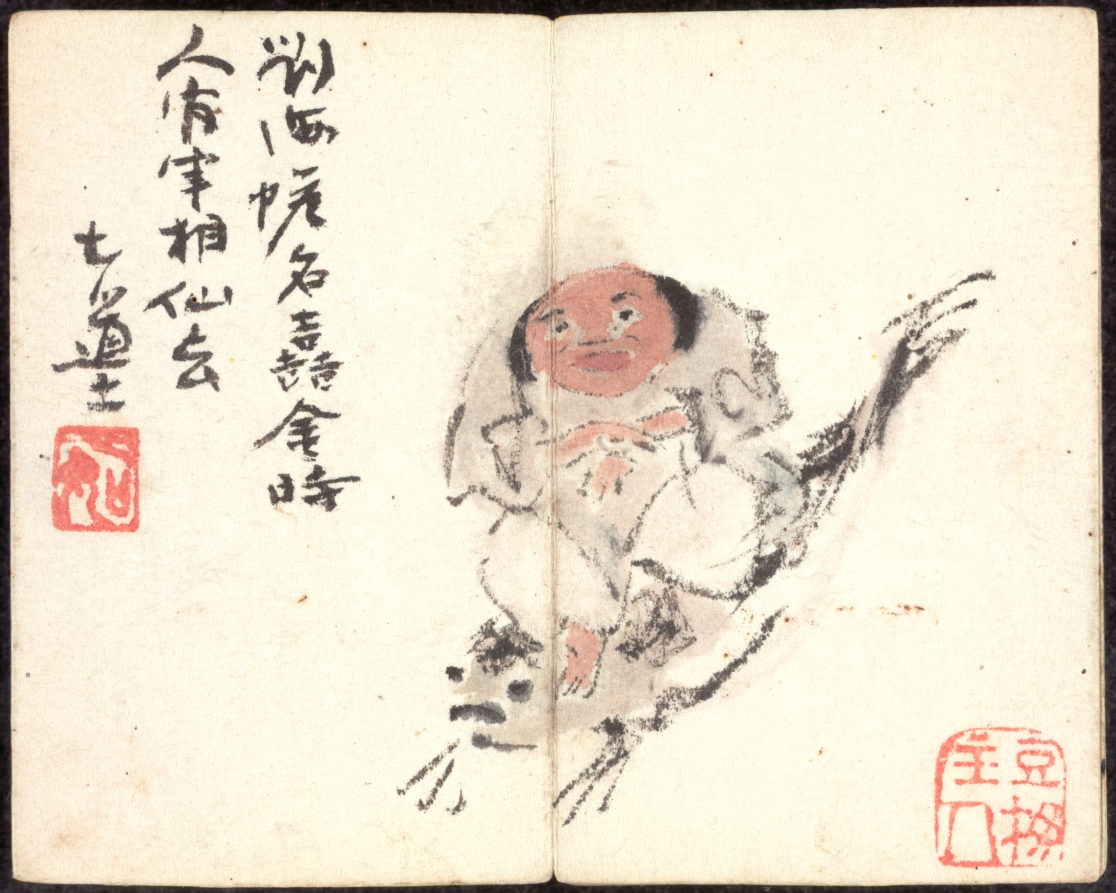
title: Miniature Album with Figures and Landscape (Man Riding Carp)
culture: China, Qing dynasty (1644–1911), Qianlong reign (1736–95)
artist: Zeng Yandong (Chinese, c. 1751–1827)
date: 1822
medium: album leaf, ink and color on paper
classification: Painting